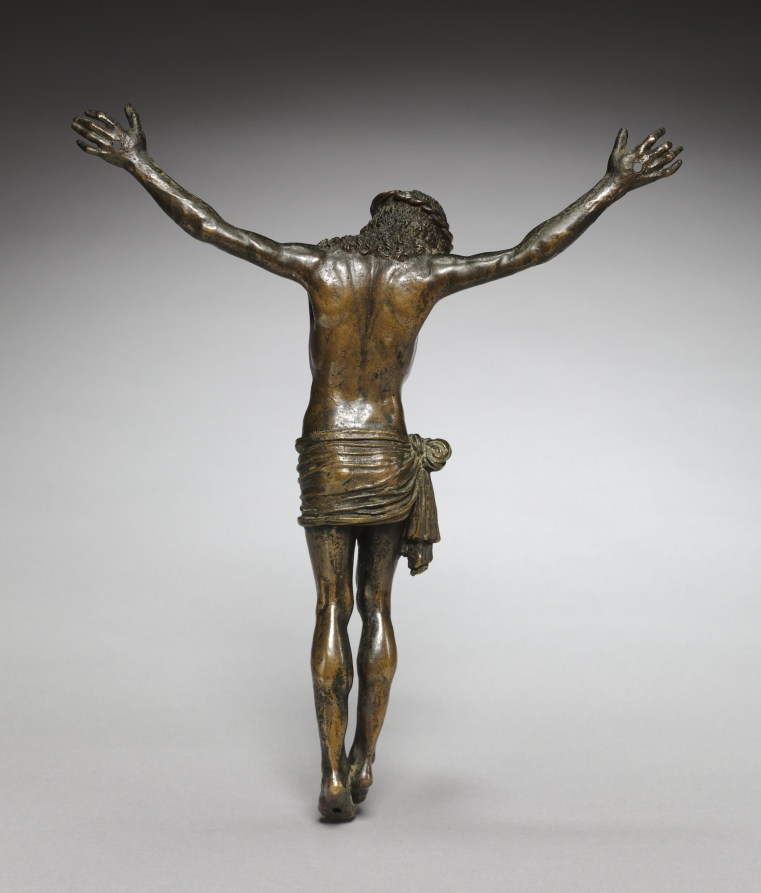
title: Crucified Christ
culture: Italy, Ravenna, 16th century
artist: Severo da Ravenna (Italian, c.1496–c.1543)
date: c. 1500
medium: bronze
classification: Sculpture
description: The highly finished surface of this sculpture, including the back, suggests it belonged to a refined collector. Small sculptures would often be held to admire details such as the strands of hair streaming onto Christ’s shoulders, the prominent veins in his forearms, and the intricate knotted cloth at his side.